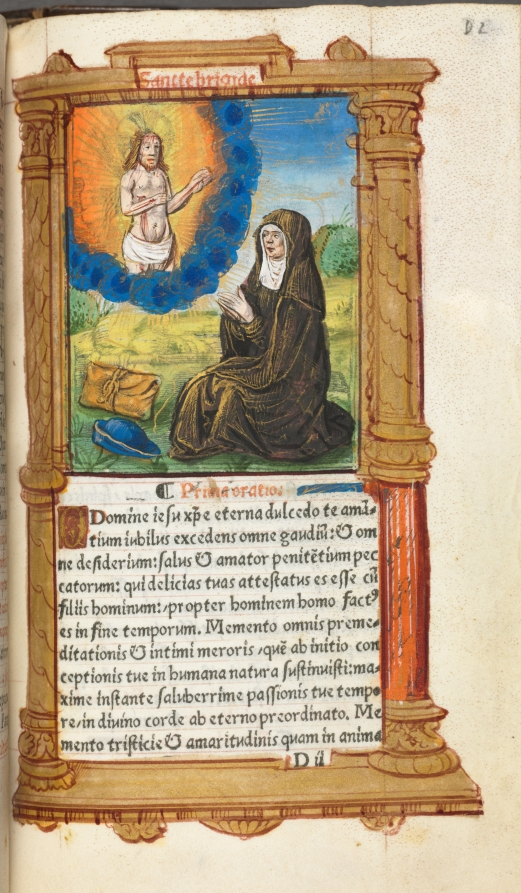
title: Printed Book of Hours (Use of Rome): fol. 90r, St. Bridget in Prayer before an Apparition of Christ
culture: France, Paris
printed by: Guillaume Le Rouge (French, Paris, active 1493–1517)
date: 1510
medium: 112 Printed folios on parchment, bound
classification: Bound Volume